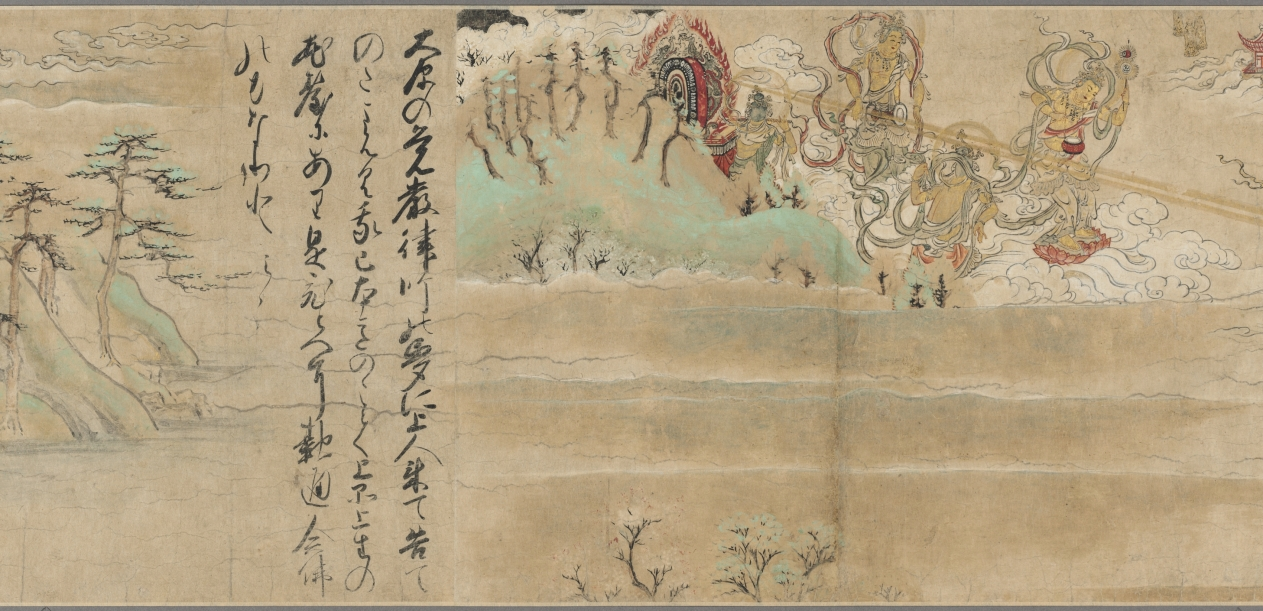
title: The Illustrated Miraculous Origins of the Yūzū Nenbutsu School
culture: Japan, Kamakura period (1185–1333)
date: early 1300s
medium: Handscroll; ink, color, and gold on paper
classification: Painting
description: This painting is the second of a set of two illustrated handscrolls. The first scroll depicts the biography of the Japanese Buddhist monk Ryōnin. This scroll begins with scenes of Ryōnin’s death and relates episodes illustrating the efficacy of following his teachings. Ryōnin asserted the total interconnectedness of all things and the spiritual benefit of chanting the name of the Buddha Amida for one another.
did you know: The other scroll from this two-scroll set belongs to the Art Institute of Chicago.